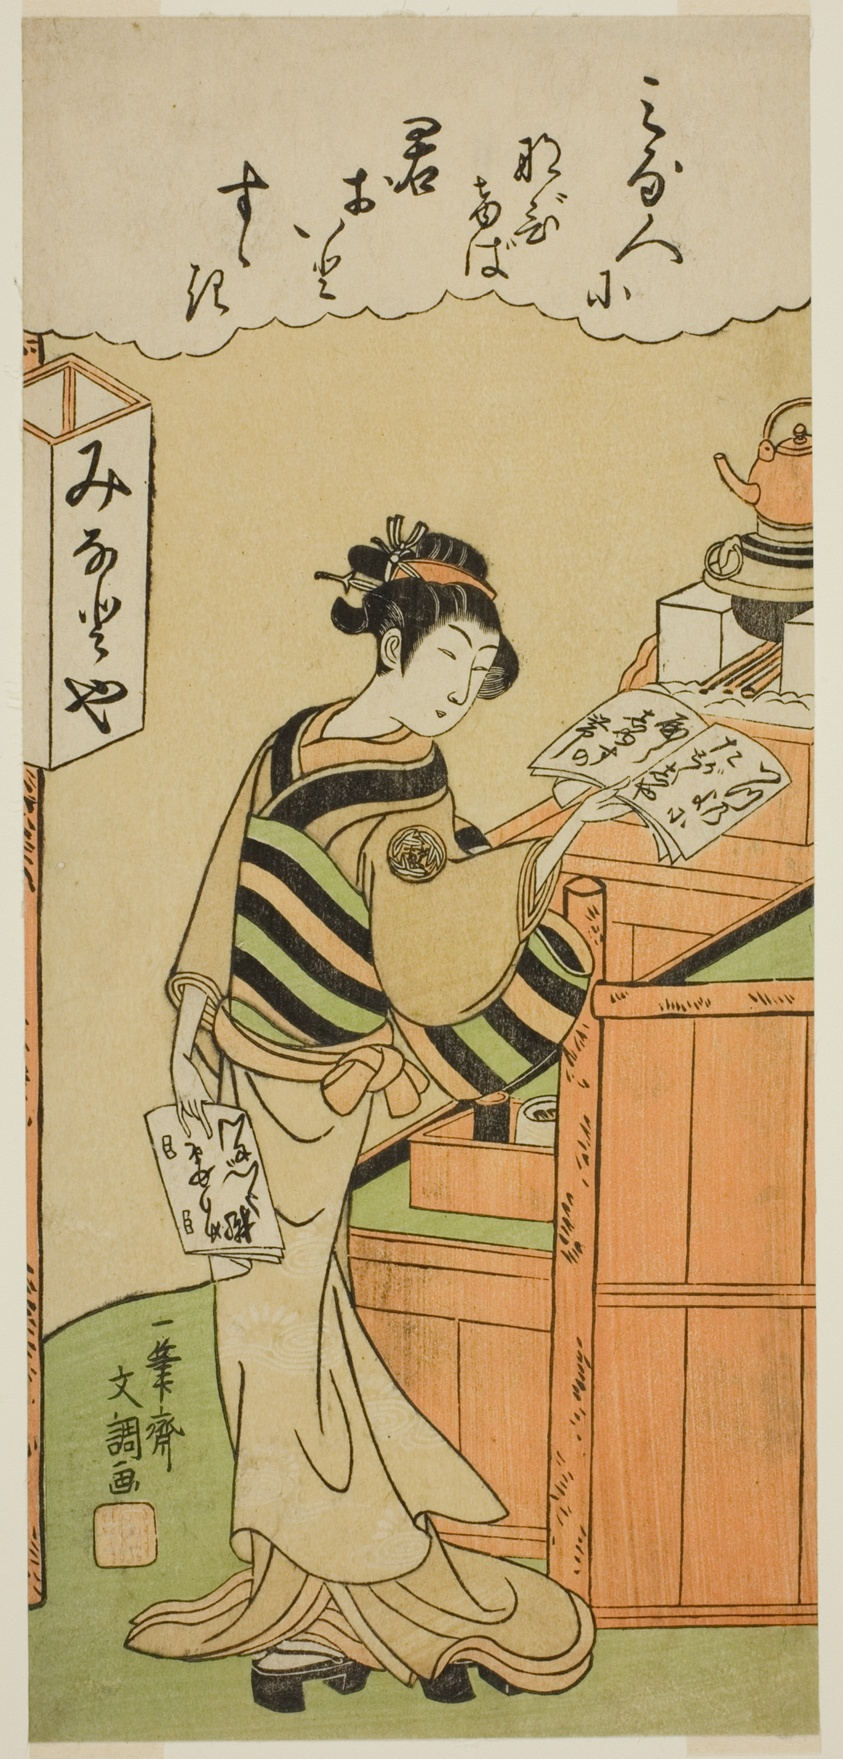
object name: Print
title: Waitress at the Minatoya Teahouse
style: Japanese (culture or style)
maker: Ippitsusai Buncho (Japanese, active c. 1755-90)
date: c. 1769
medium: Color woodblock print; hosoban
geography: Japan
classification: woodblock print; print; asian art